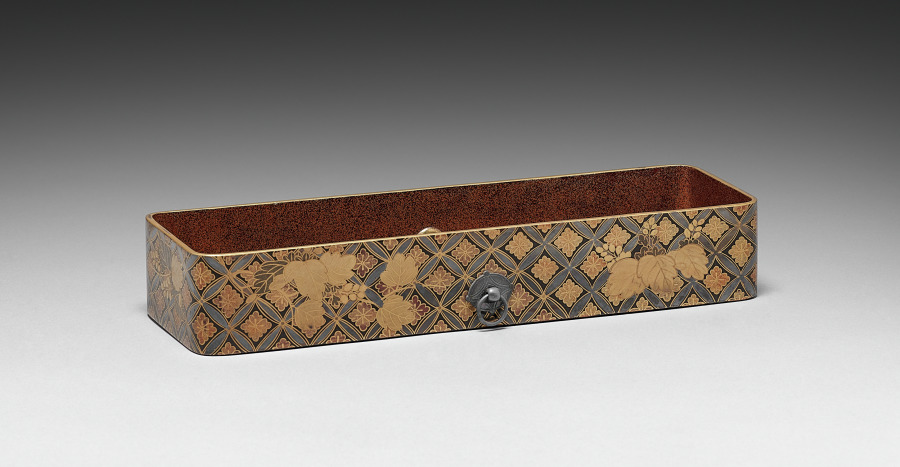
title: Letter Box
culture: Japan, Edo period (1615–1868)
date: 1615–1868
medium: lacquer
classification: Lacquer